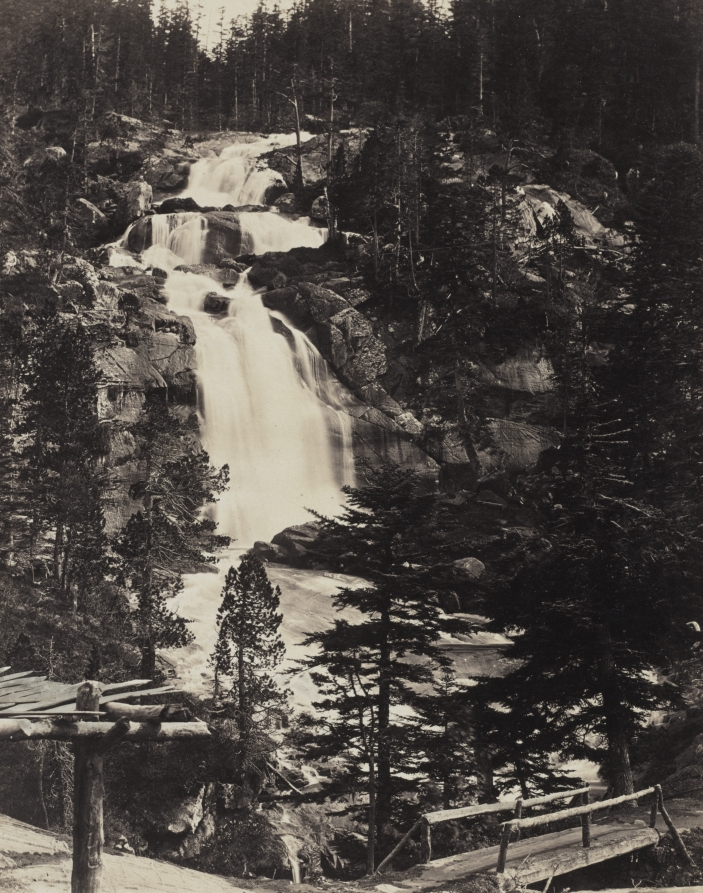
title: Great Upper Waterfall, High Alps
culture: France, 19th century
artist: Louis-Alphonse Davanne (French, 1824–1912)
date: c. 1862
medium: albumen print from wet collodion negative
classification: Photograph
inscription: Written in pencil on recto: "Gde Cascade Supérieure"; "D31"; in pencil on verso: "26"; "ADI"; "No 133"